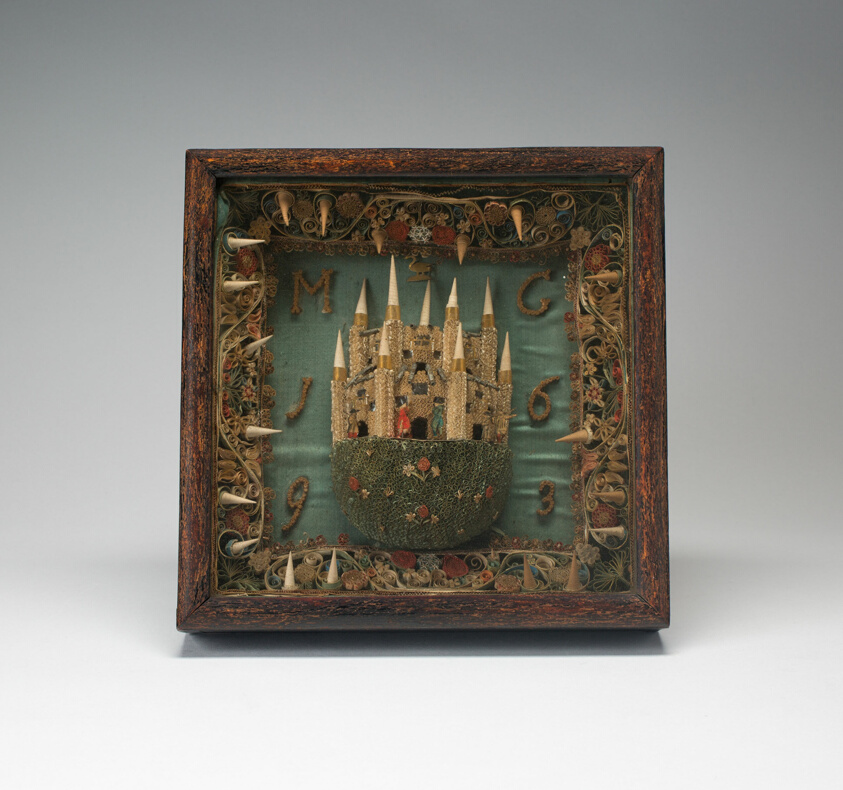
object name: Mixed Media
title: Shadow Box: Castle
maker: Probably Spain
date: 1693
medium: Rolled paperwork, colored and gilded, silk, wood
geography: Spain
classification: paper; european decorative arts; glass